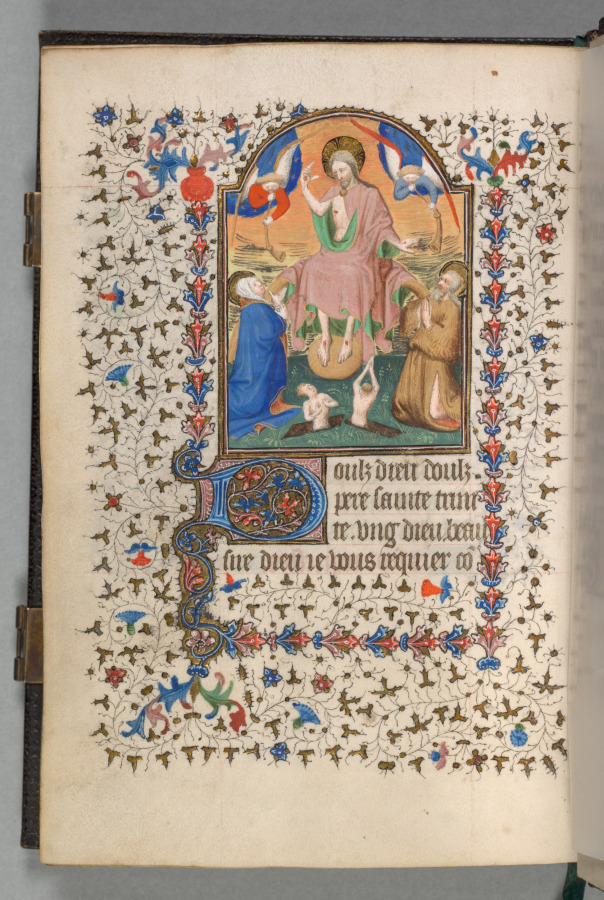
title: Book of Hours (Use of Paris): Fol. 204v, Last Judgment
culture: France, Paris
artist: possibly studio or workshop of The Bedford Master (French, Paris, active c. 1405–30)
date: c. 1420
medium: ink, tempera, and gold on vellum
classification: Bound Volume